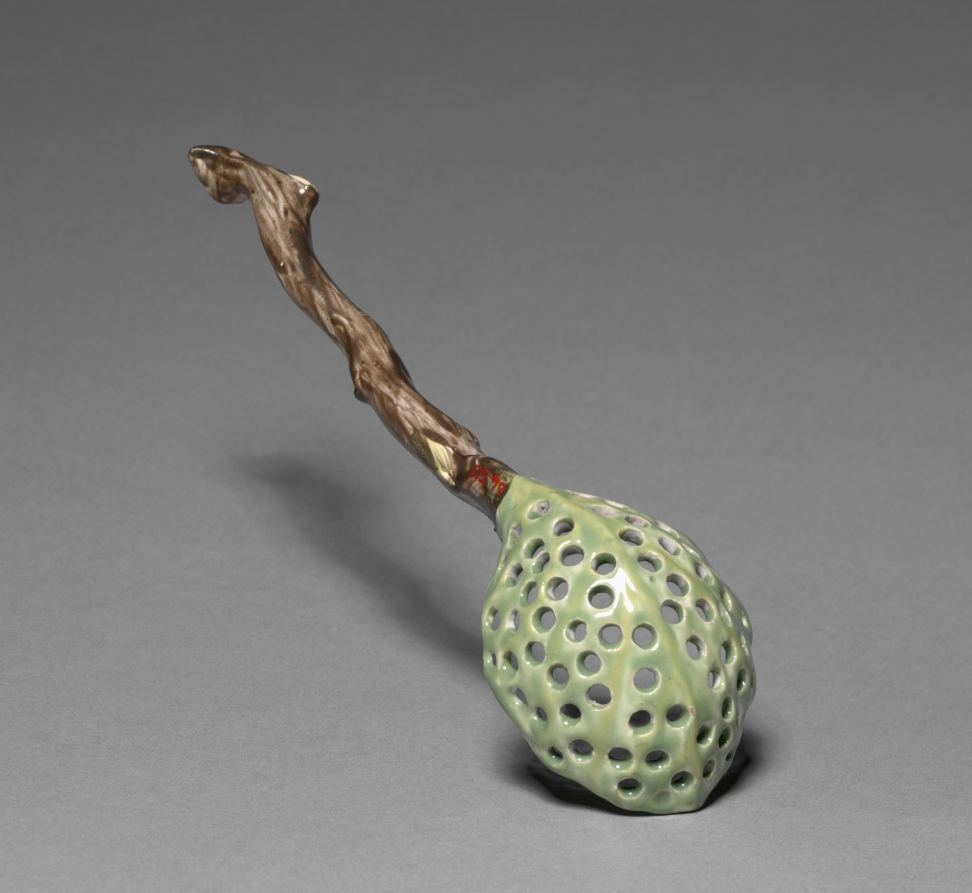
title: Sugar Spoon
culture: France, Marseilles, mid-18th century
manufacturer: Veuve Perrin Factory (French)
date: c. 1760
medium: tin-glazed earthenware (faience) with enamel decoration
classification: Ceramic